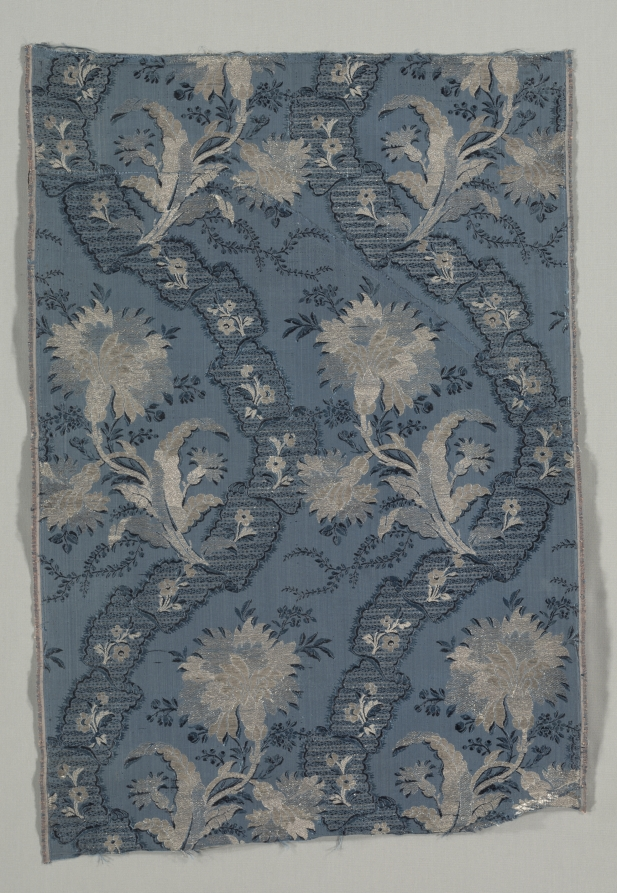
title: Two Joined Panels of Figured Silk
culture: France, 18th century, Period of Louis XV (1723-1774)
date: 1723–1774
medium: taffeta, brocaded; silk and silver thread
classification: Textile